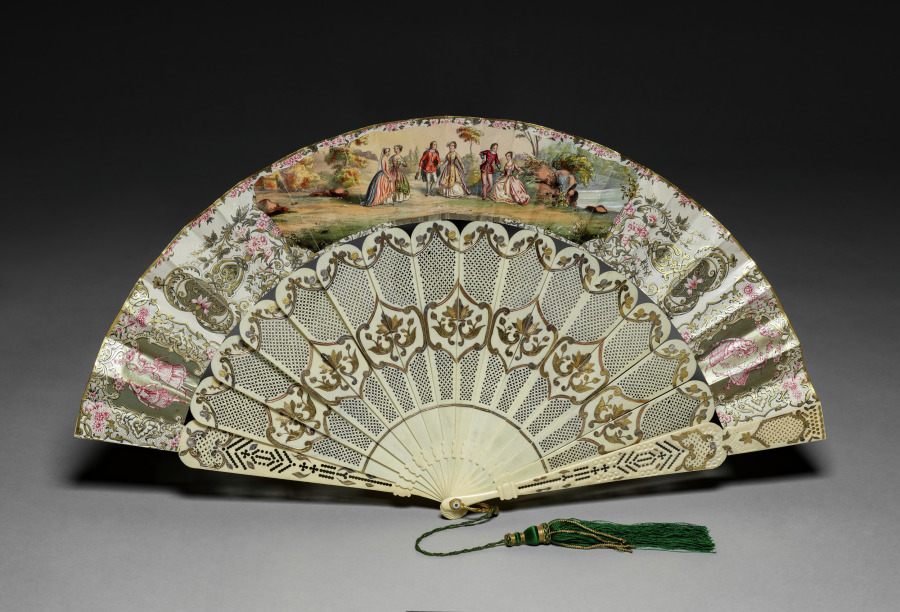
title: Fan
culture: Europe, mid-19th century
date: mid 1800s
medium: bone, paper, gold and silver leaf, paint, silk tassle with gold threads, mother-of-pearl washer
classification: Miscellaneous